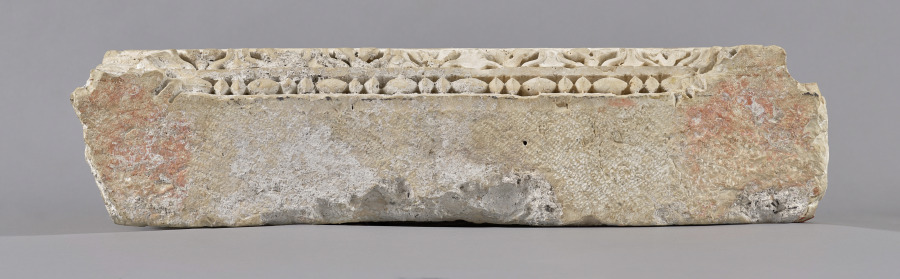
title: Tomb Relief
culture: Syria, Palmyra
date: 230 CE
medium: limestone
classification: Sculpture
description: Although its findspot is unknown, this high relief almost certainly once sealed a burial niche of a mausoleum at Palmyra. It illustrates a blending of Roman and Parthian artistic traditions. Set within a sumptuous border of beads and leaves, a wealthy man awakens on a luxuriously cushioned bed as his attendant offers him a wine bowl decorated with crosshatchings. Both are dressed according to Parthian custom, wearing pants and pleated tunics, but the man’s languid pose is taken from classical prototypes. The subject is a variant of a formulaic funerary banquet scene in which proffered wine welcomes the deceased into a well-appointed afterlife.